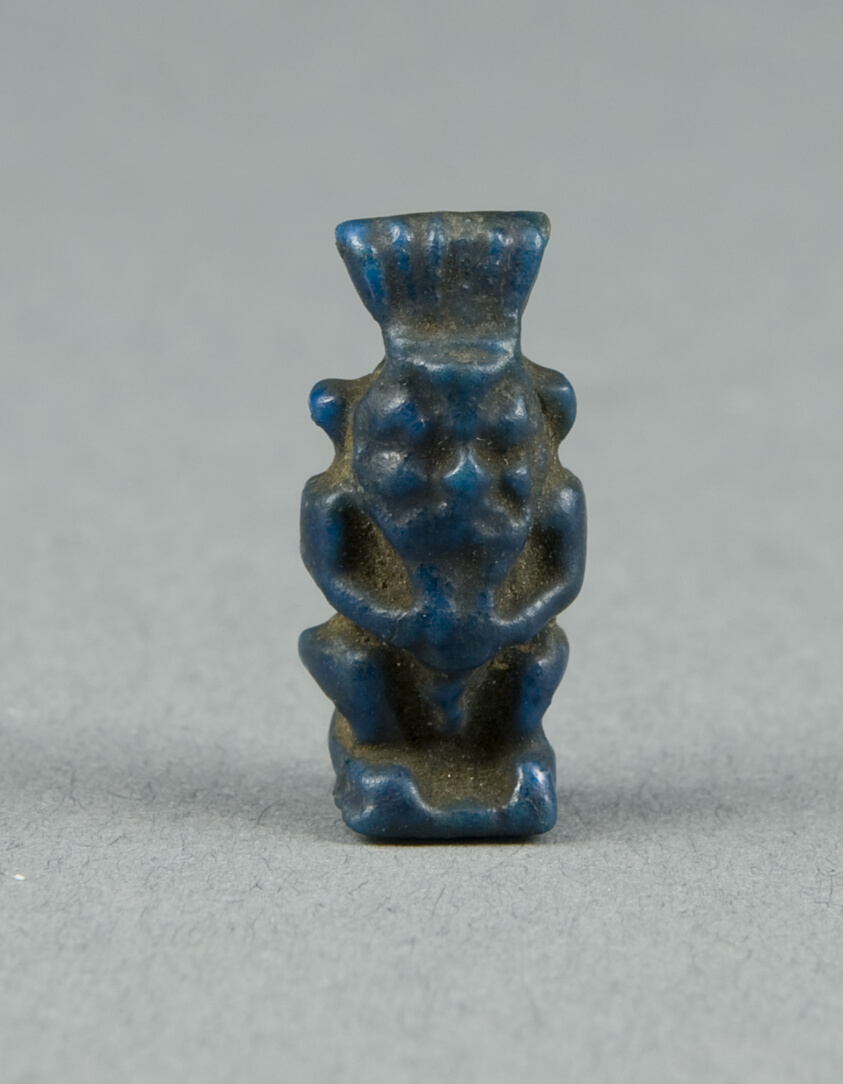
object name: Costume and Accessories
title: Amulet of the God Bes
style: egyptian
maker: Egyptian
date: Third Intermediate Period (about 1069–664 BCE)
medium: Faience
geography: Egypt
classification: amulet; jewelry; ceramics; ancient art; costume; faïence (composite material)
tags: gods (deities)